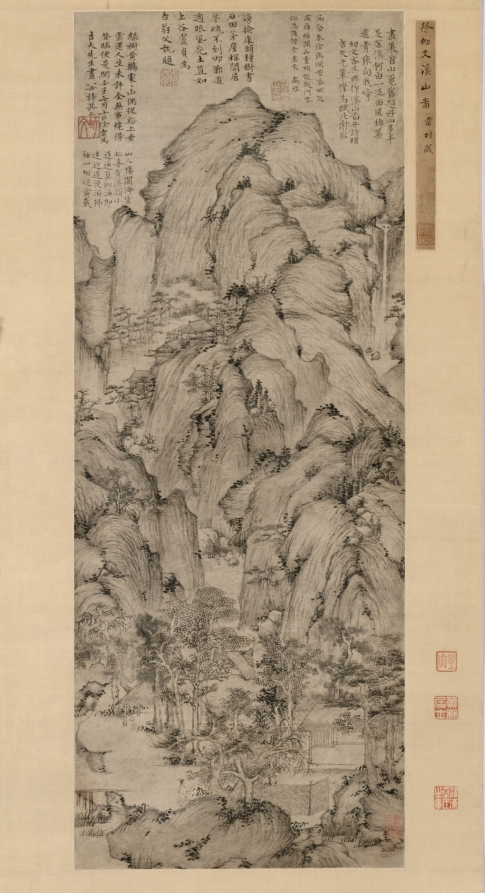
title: Streams and Mountains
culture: China, Yuan dynasty (1271-1368)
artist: Xu Ben (Chinese, 1335–1380)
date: 1372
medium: hanging scroll, ink on paper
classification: Painting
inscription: 綠樹黃鸝處處山， 偶從谿上看雲還。/ 人生未許全無事， 纔得登臨便是閑。 壬子七月十日徐賁為吉夫先生畫 並詩共上 [印] 幼文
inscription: Label on mounting probably by Liang Qingbiao 梁清標 (1620–1691).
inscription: 4 additional inscriptions and 9 additional seals: 1 poem of Xie Hui 謝徽 (c. 2nd half 14th c.); 1 poem and 1 seal of Gao Qi 高啟 (1336–1374); 1 poem and 1 seal of Lu Zhen 盧貞 (c. late 14th c.); 1 poem of Huang Zai 黃載; 3 seals of Liang Qingbiao 梁清標 (1620–1691); 1 seal of Wang Jiqian [C. C. Wang] 王季遷 (1907–2003); 3 seals unidentified.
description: Like many literati of the late Yuan and early Ming dynasties, Xu Ben was entangled with the perils of dynastic change as well as the ups and downs of his official career. It was mainly through the art of painting and poetry, as well as the ideal of reclusion, that he sought feelings of exhilaration and shared them with his friends. Xu created this monumental landscape during one of his periods of reclusion. His innumerable “hemp-fiber” texture strokes create a unifying rhythm among the towering mountains with tightly knit masses of rocks. Nestled among shady trees at the base of the mountain is a rustic retreat, which a scholar approaches on foot to visit with the hermit. Among the five inscriptions at the top of the painting is one by the artist himself. He dedicated the painting to someone named Jifu 吉夫 and recorded a poem in praise of mountains. Green trees, yellow orioles, everywhere are mountains; Aimlessly I return from the stream, where I watched the clouds. Man's life does not allow unbroken ease, But to be able to be high up in the mountain, this is leisure.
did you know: An attendant opens a reed gate to welcome the scholar with a walking stick approaching the rustic retreat.